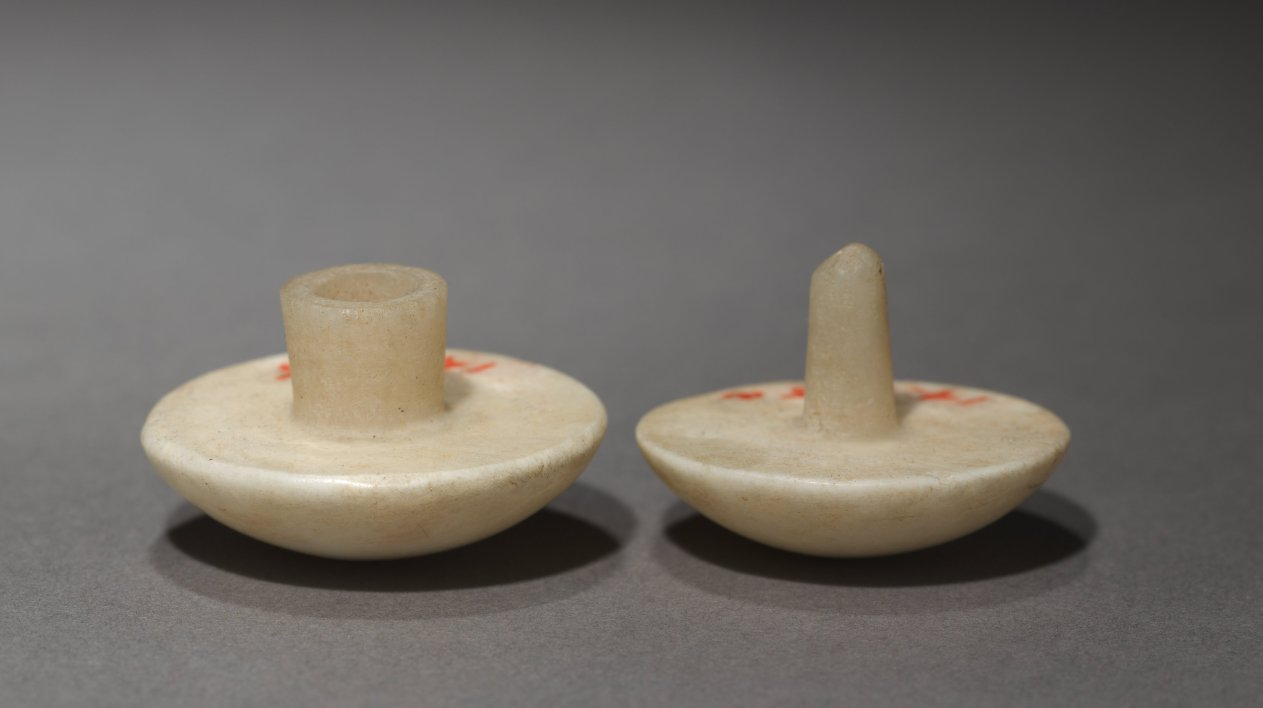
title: Pair of Earrings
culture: Egypt, New Kingdom (1540–1069 BCE), Dynasty 18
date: 1540–1296 BCE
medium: travertine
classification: Jewelry